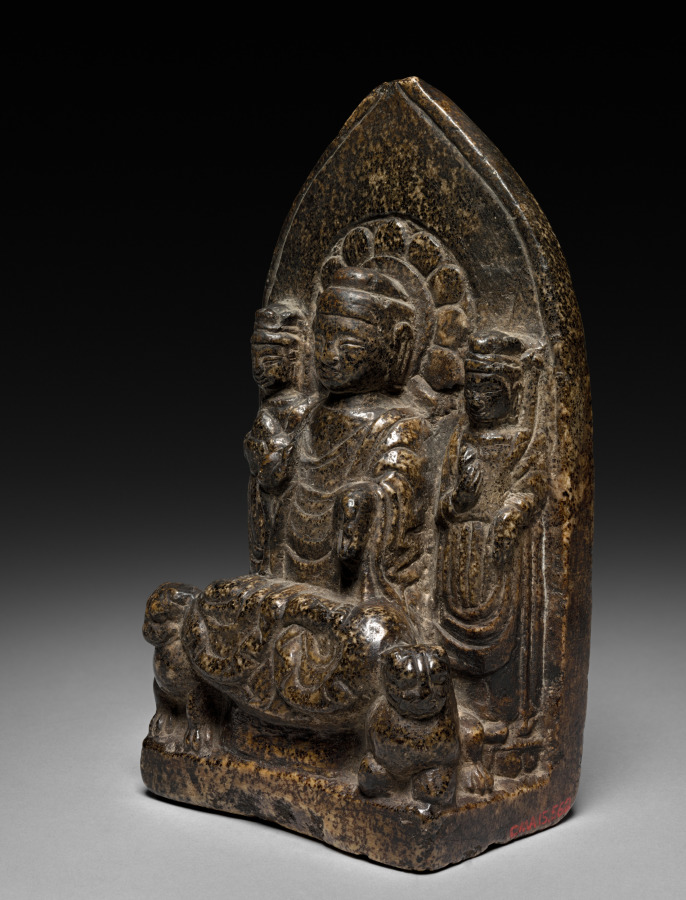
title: Buddha Triad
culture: China, Northern Dynasties period (386–581 CE), Northern Zhou (557-581)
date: 568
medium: stone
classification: Sculpture